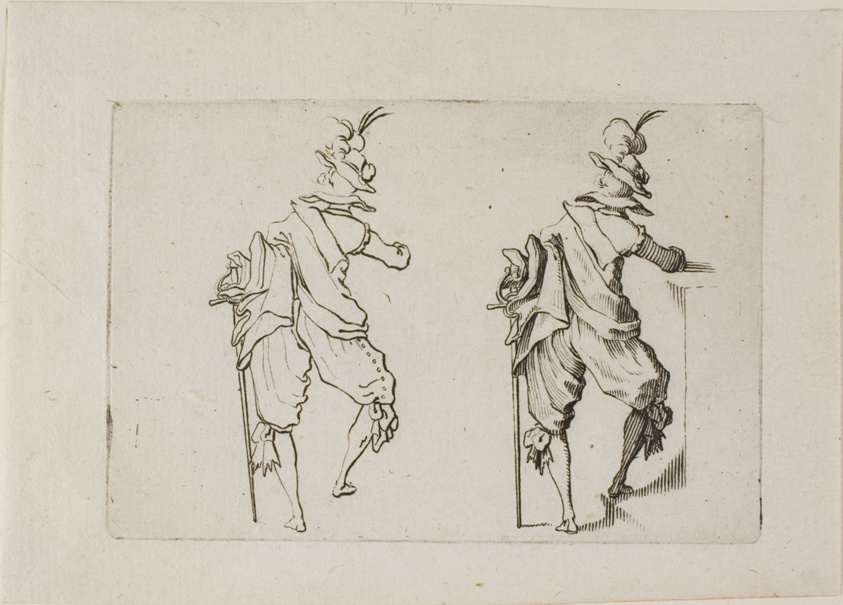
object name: Print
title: The Man Seen from the Back with a Large Sword, from The Caprices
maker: Jacques Callot (French, 1592-1635)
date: c. 1622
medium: Etching on ivory laid paper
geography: France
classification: etching; print; prints and drawing